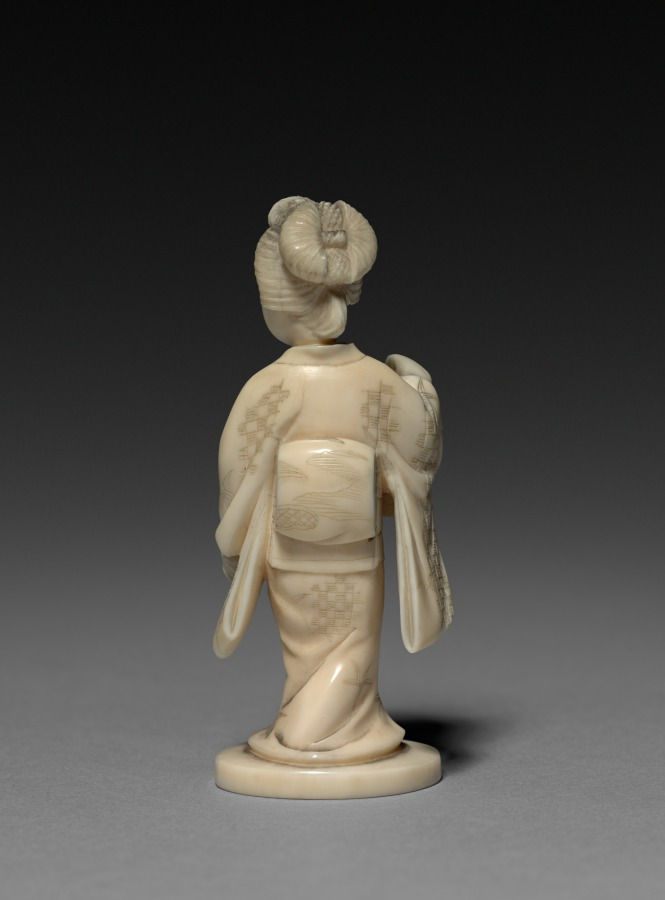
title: Woman Carrying a Basket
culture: Japan, Meiji period (1868–1912)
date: early 1900s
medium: ivory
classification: Ivory